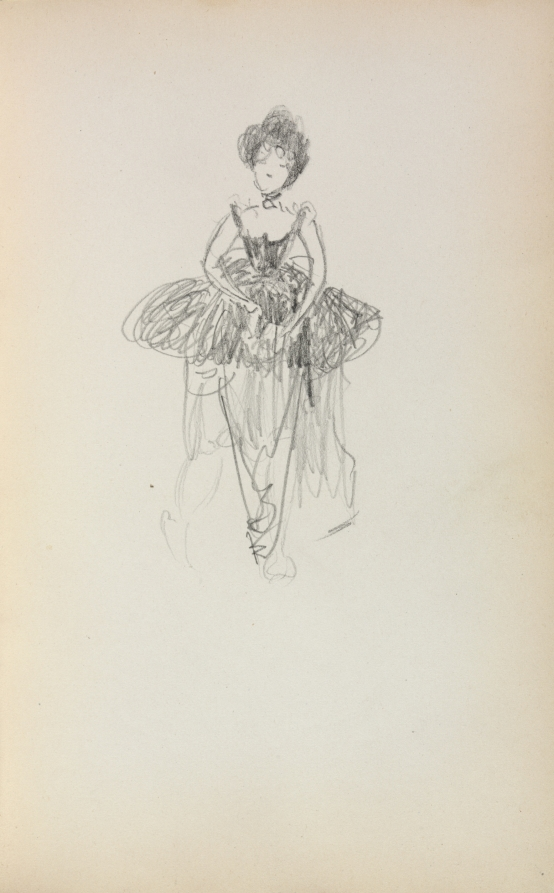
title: Italian Sketchbook: Ballerina (page 231)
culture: America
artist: Maurice Prendergast (American, born Newfoundland [now Canada], 1858–1924)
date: 1898–1899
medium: pencil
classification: Bound Volume